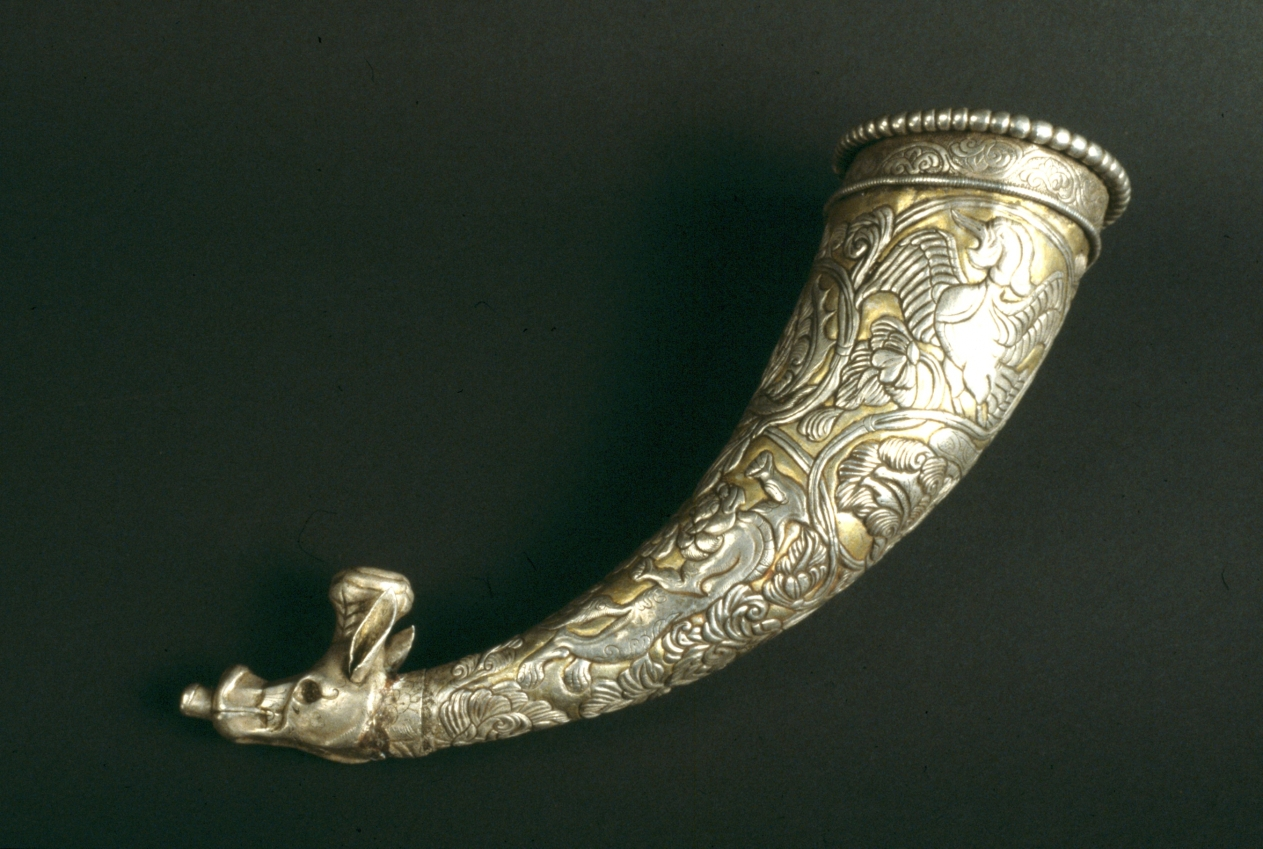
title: Rhyton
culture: Central Asia (Sogdiana) or Tibet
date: c. late 600s–early 700s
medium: silver with gilded foil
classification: Silver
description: The form of the animal-headed rhyton as a drinking vessel and the use of silver are evidence of cultural exchange with Persia, while the lush, luxurious quality of the design and the form of the lions and curling dragon on one side of the decanter reveal an awareness of Chinese forms. Poured into the large opening at the top of the horn, wine then flowed out through the small tube held between the parted lips of a bovine-like animal. To keep from spilling, drinkers could stop the flow of the liquid by holding a thumb over the lower aperture.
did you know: This drinking horn was a communal vessel which guests would pass around to share wine at parties.